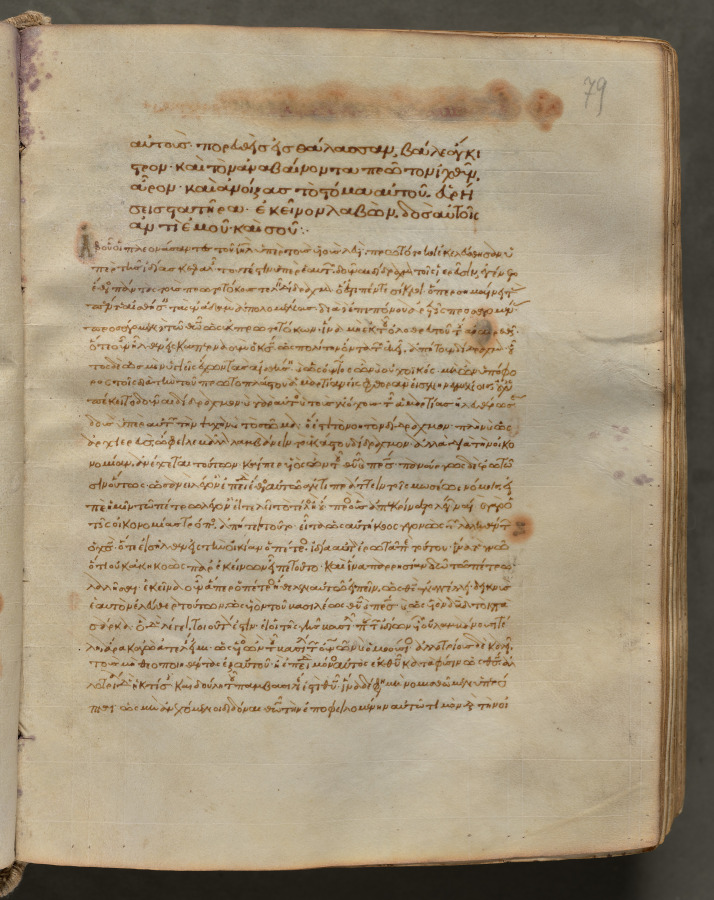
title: Text, folio 79 (recto), from a Gospel Book with Commentaries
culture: Byzantium, Constantinople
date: c. 1000–1100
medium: ink, tempera, and gold on vellum; leather binding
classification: Bound Volume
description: Each of the four gospels in this book opens on a page with brilliantly illuminated borders depicting the author of the text as well as birds-principally peacocks, symbols of the immortality of the soul-and fountains, representing the fountain of life and the salvation of the soul. This volume consists of 428 leaves with texts in Greek. Its level of sophistication suggests that it was probably written and decorated in a monastery in Constantinople.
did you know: Gospel Books were carried in procession through Byzantine churches.